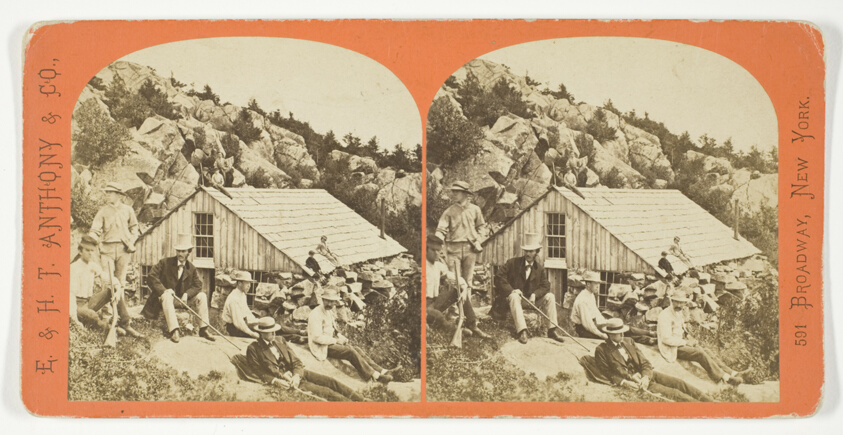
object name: Photograph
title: Group on Summit of the Mountainstereo, No. 8305 from the series "Mount Kearsarge Scenery, Andover, New Hampshire"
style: 19th century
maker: Anthony & Company; American, active 1848–1901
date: 1869/1901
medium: Albumen print,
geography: United States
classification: stereograph (albumen); albumen silver print; photographic process; photography; photograph